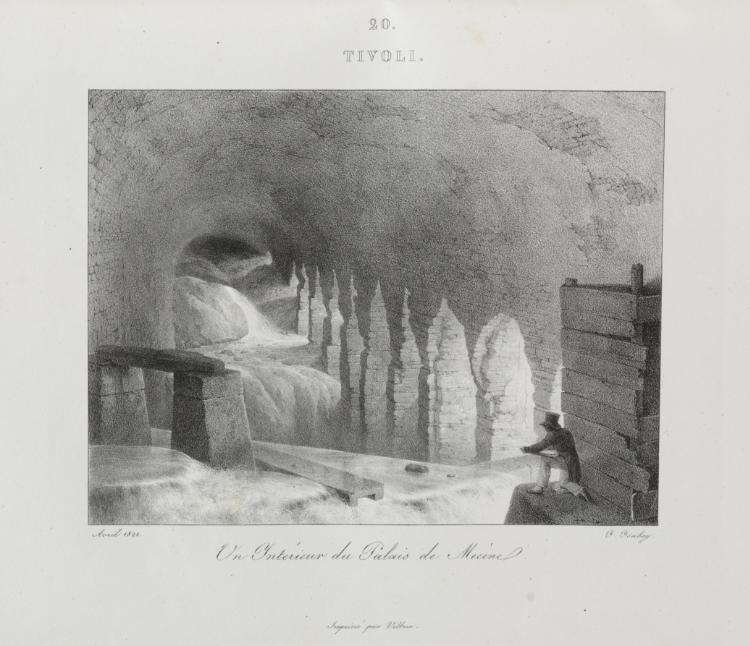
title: Voyage en Italie en 1822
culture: France, 19th century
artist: Jean-Baptiste Isabey (French, 1767–1855)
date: 1833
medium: lithograph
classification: Bound Volume